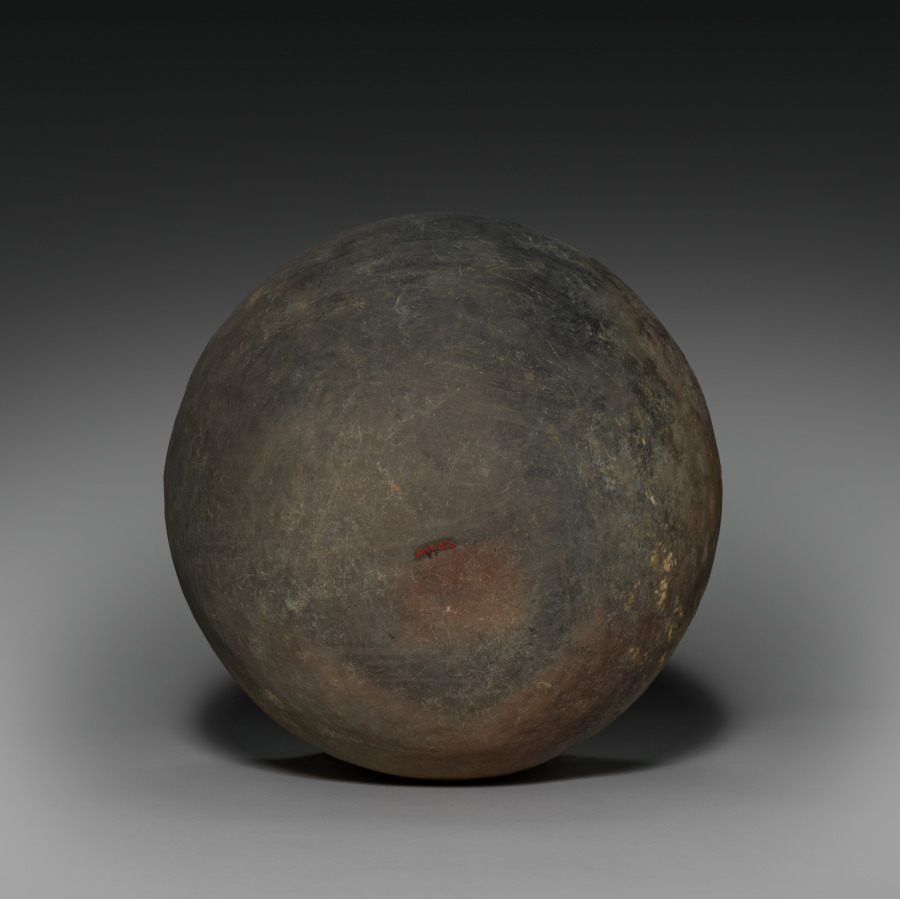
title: Vessel with Knobbed Lid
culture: Korea, Gaya period (42–562 CE)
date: 200s–300s CE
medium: stoneware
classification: Ceramic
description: This storage vessel is distinguished by its robust, subtly proportioned form and its body color. The purplish-brown surface "skin" is enlivened by a series of smoky black swirling marks that occurred during the firing in the wood kiln. This shape began as a series of clay coils that were pinched and then paddled; however, it spent more time on a potter's wheel to thin and finish its outer surface. The lid received similar, understated attention to detailing and finish.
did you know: This type of lidded vessel served to contain cremated remains, indicating the popularity of Buddhist mortuary practice in Korea during the Three Kingdoms period.